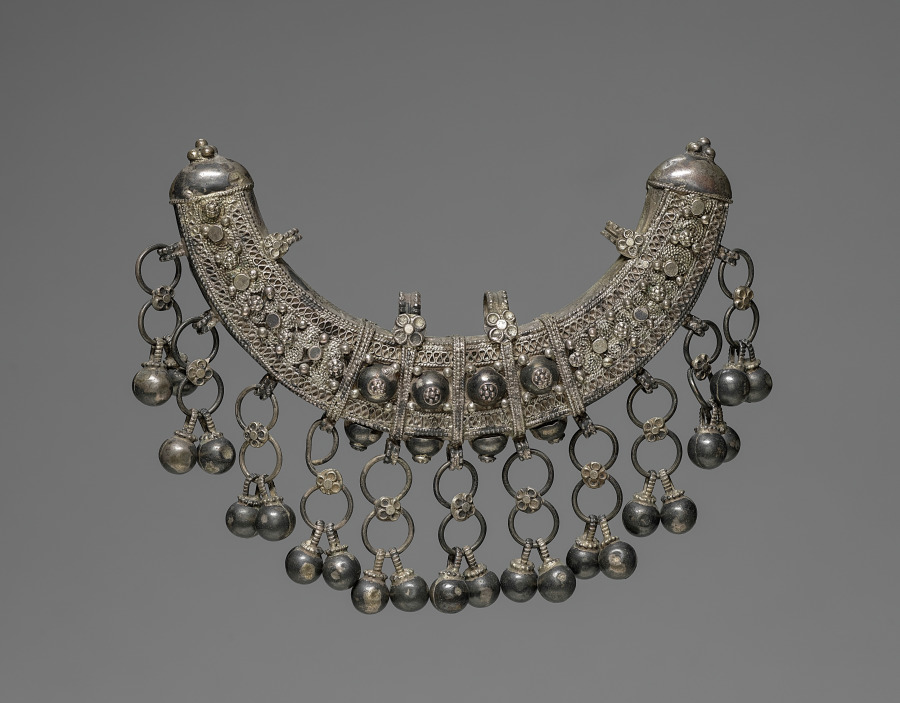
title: Part of a Necklace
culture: India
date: 1800s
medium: silver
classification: Jewelry